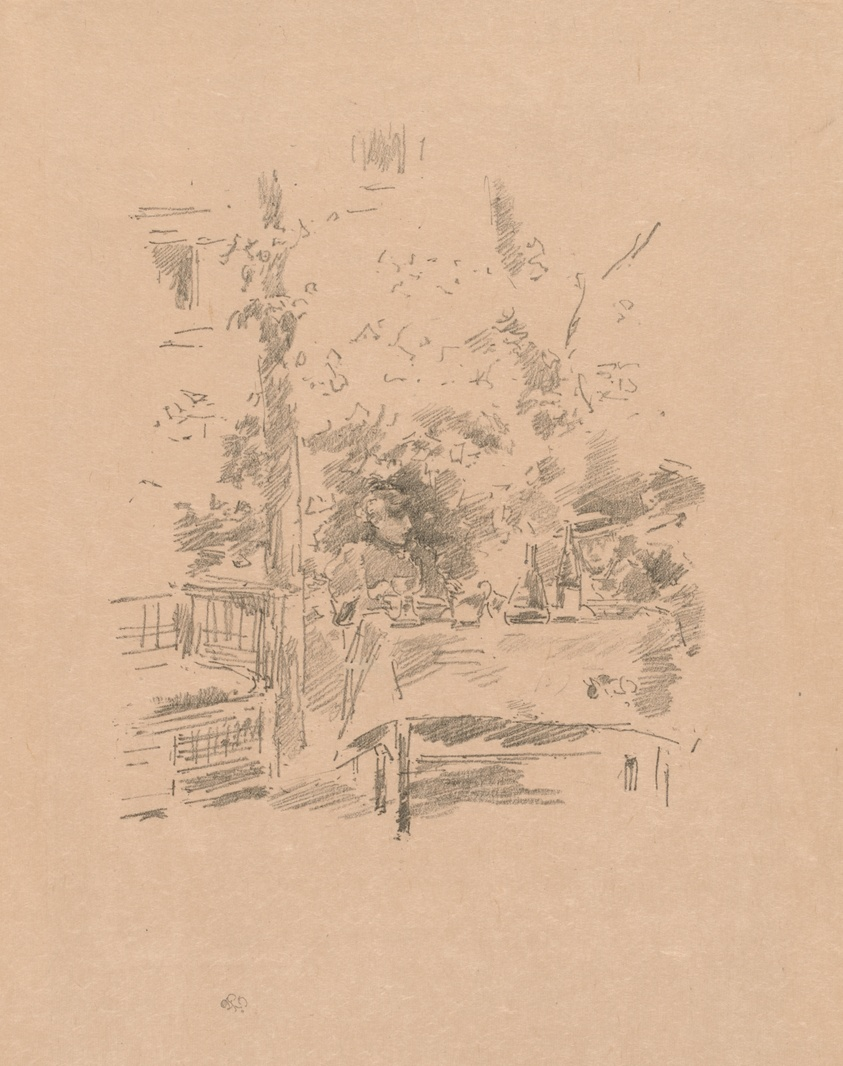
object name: Print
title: Tête-à-tête in the Garden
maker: James McNeill Whistler (American, 1834-1903)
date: 1894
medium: Transfer lithograph in black on cream laid Japanese vellum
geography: United States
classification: transfer lithograph; lithograph; print; prints and drawing